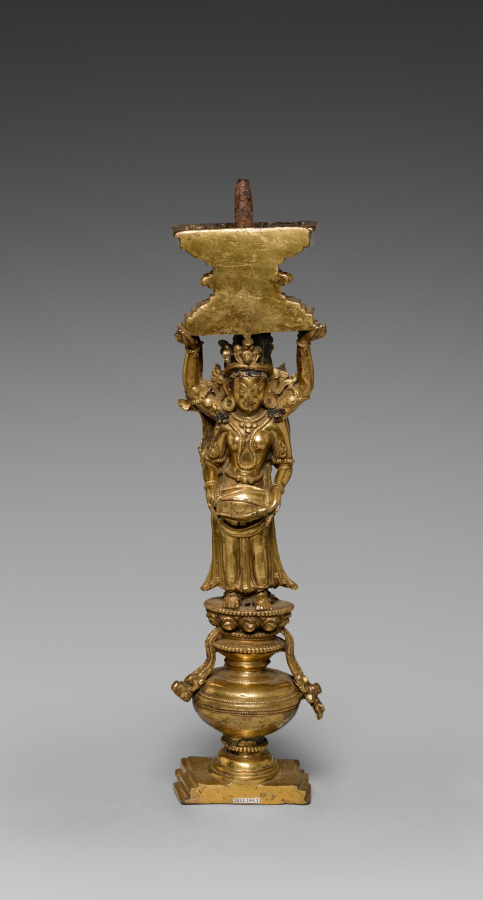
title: Support with Addorsed Figures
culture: Tibet, Densatil Monastery, 15th century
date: 1400s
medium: gilt bronze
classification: Sculpture